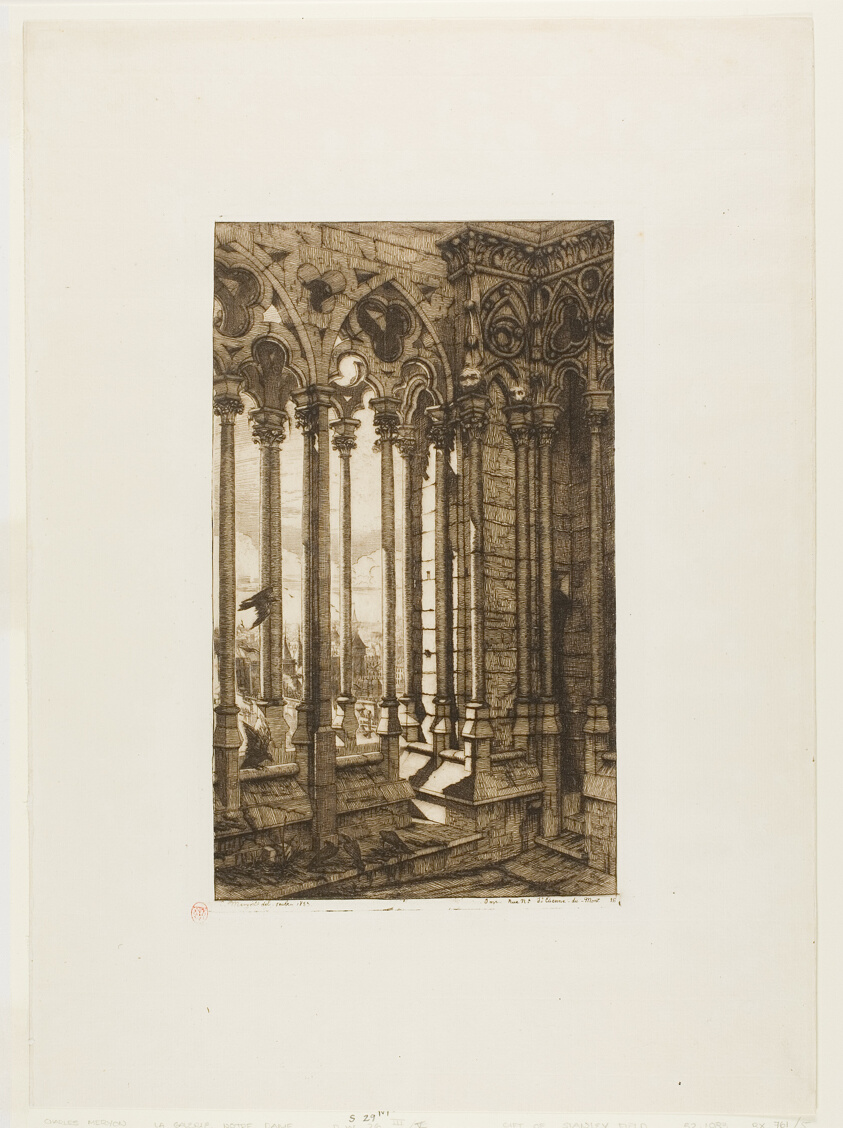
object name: Print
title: The Gallery of Notre-Dame, Paris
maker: Charles Meryon (French, 1821-1868)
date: 1853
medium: Etching in dark brown on ivory laid paper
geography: France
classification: etching; print; prints and drawing